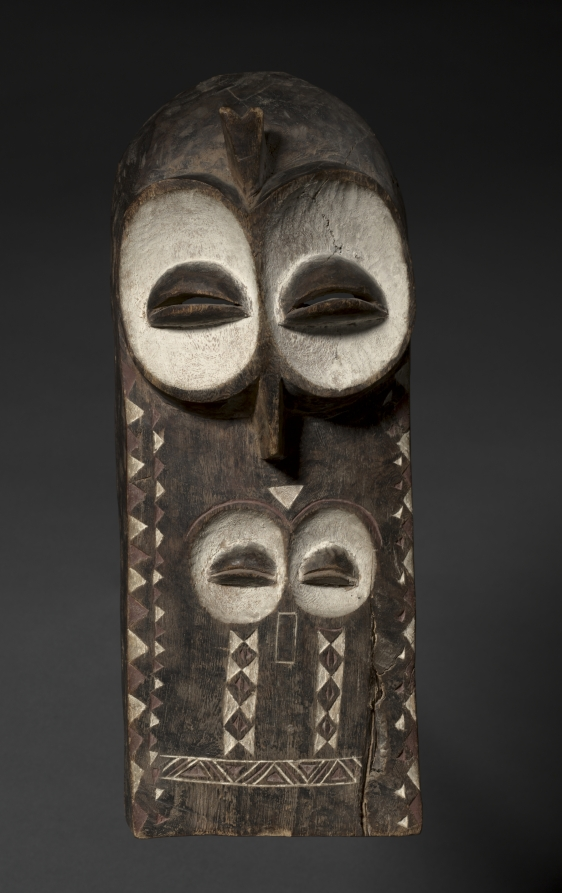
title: Mask (Emangungu)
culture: Africa, Central Africa, Democratic Republic of Congo, Bembe-style maker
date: possibly early 1900s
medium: Wood, kaolin, colorant, and iron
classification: Mask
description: Among the Bembe, anthropo-zoomorphic plank masks are used in circumcision rites called butende. They are worn along with a costume of bark and banana leaves by the initiated boys who beg for food in the village while living in seclusion in the forest. The sculpture’s short projections above the forehead are identified as an owl’s tufts. The two pairs of eyes could refer to divination.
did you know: White kaolin clay highlights the eyes of this carved wooden mask.